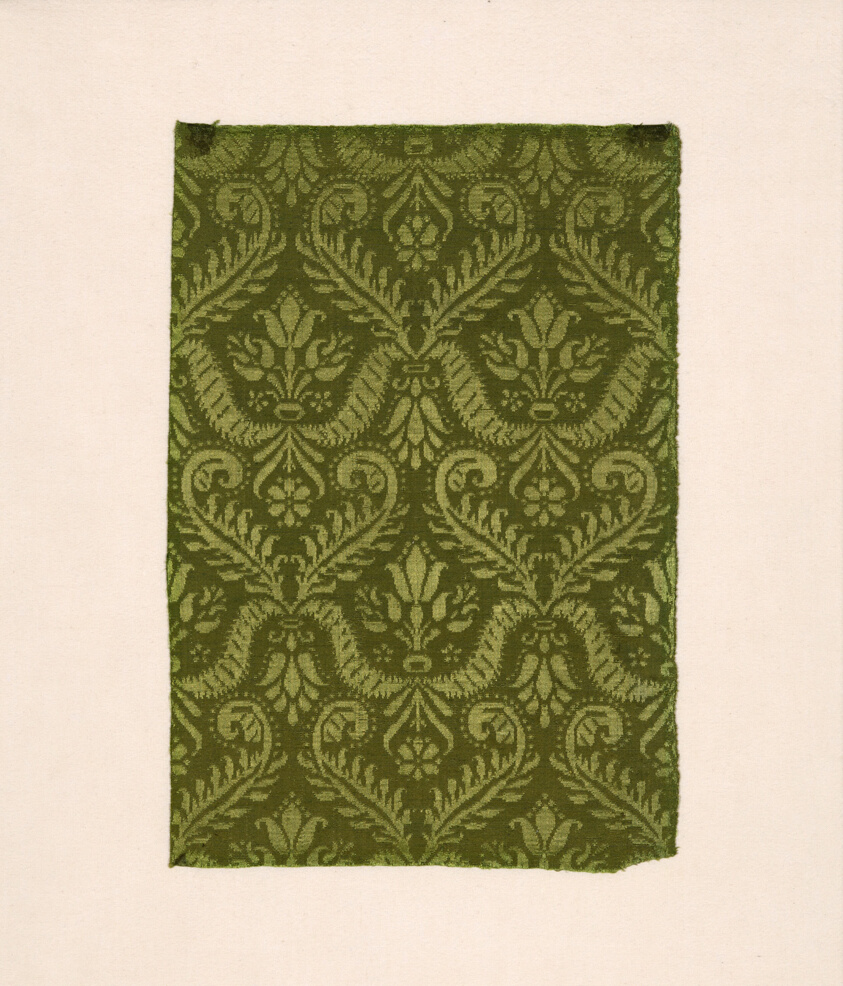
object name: Textile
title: Fragment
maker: Italy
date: 1575/1600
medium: Silk, 4:1 satin damask weave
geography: Italy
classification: textile; weaving